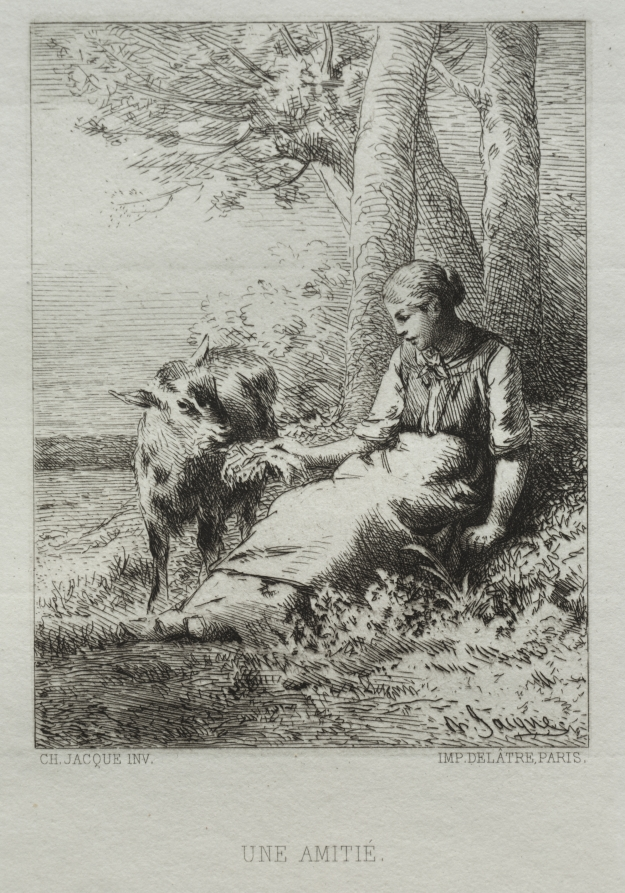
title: Friendship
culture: France, 19th century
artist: Charles-Émile Jacque (French, 1813–1894)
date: 1867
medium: etching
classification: Print